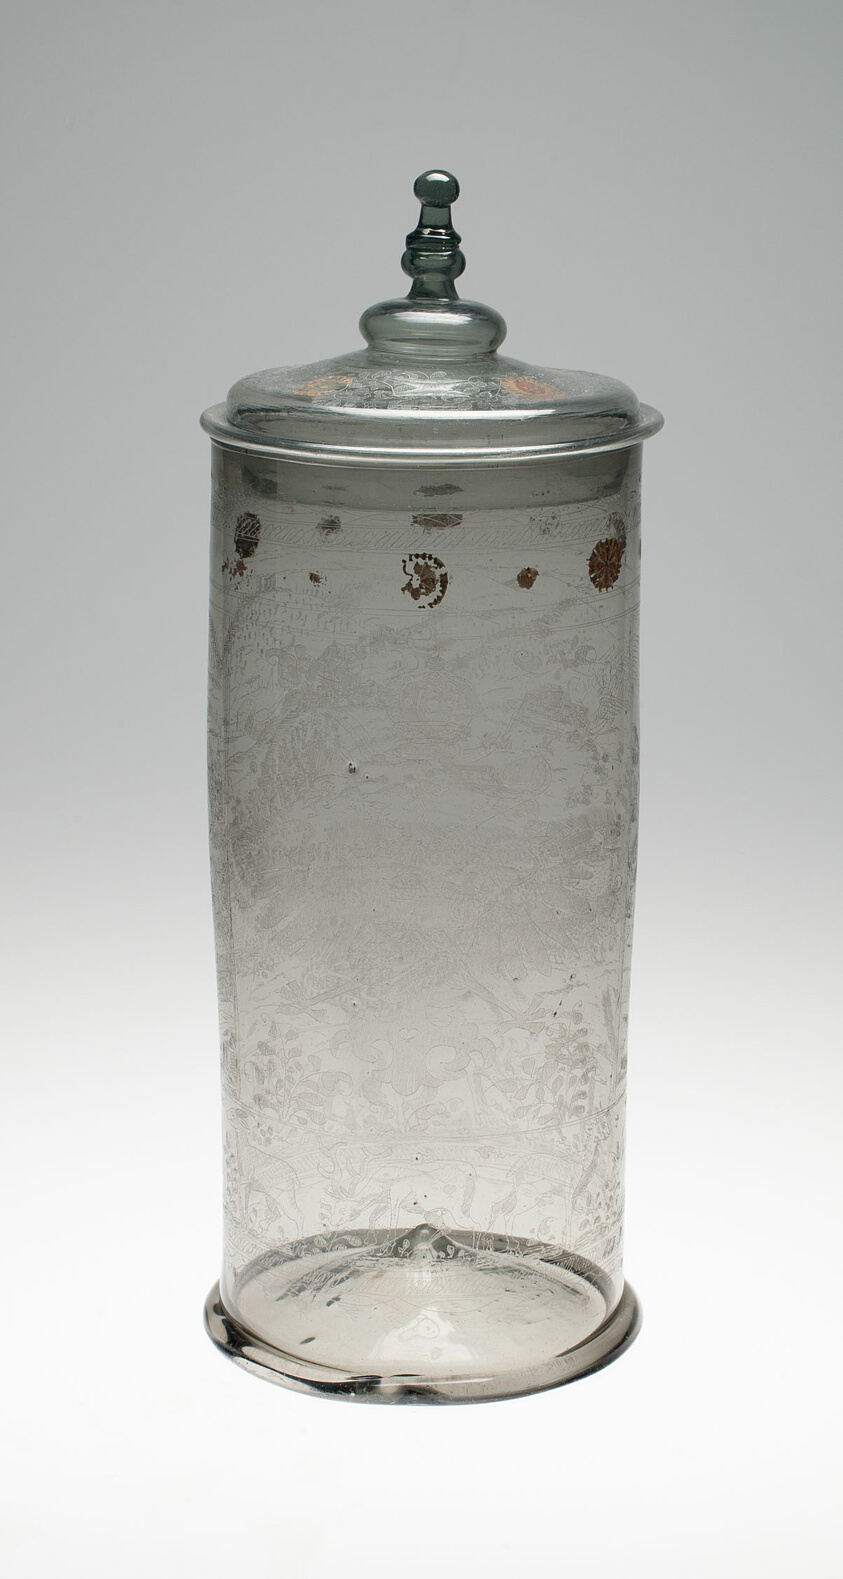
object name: Glass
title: Humpen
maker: Germany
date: 1596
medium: Glass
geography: Germany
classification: drinking vessel; glass; european decorative arts